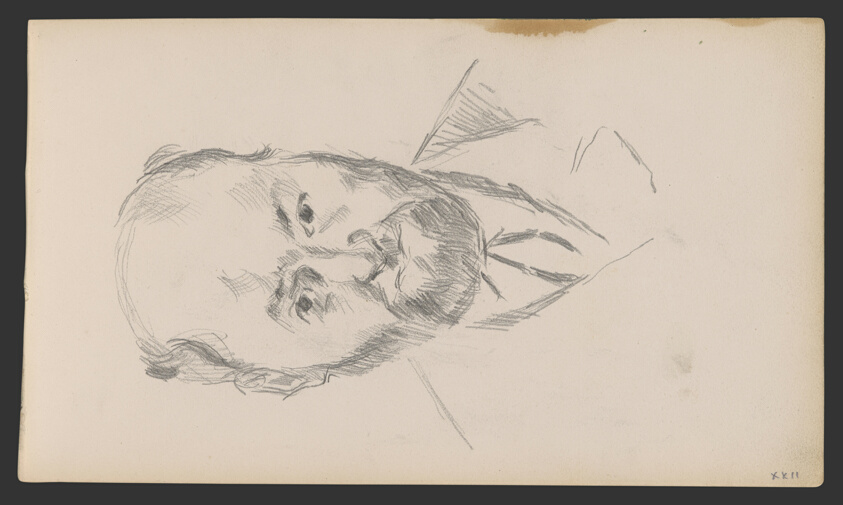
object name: Drawing and Watercolor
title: Sketchbook No. 2 (L'Estaque)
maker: Paul Cézanne; French, 1839-1906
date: 1875–86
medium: Graphite and pen and ink drawings on paper, bound into a book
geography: France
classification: sketchbook; graphite; prints and drawing; paper